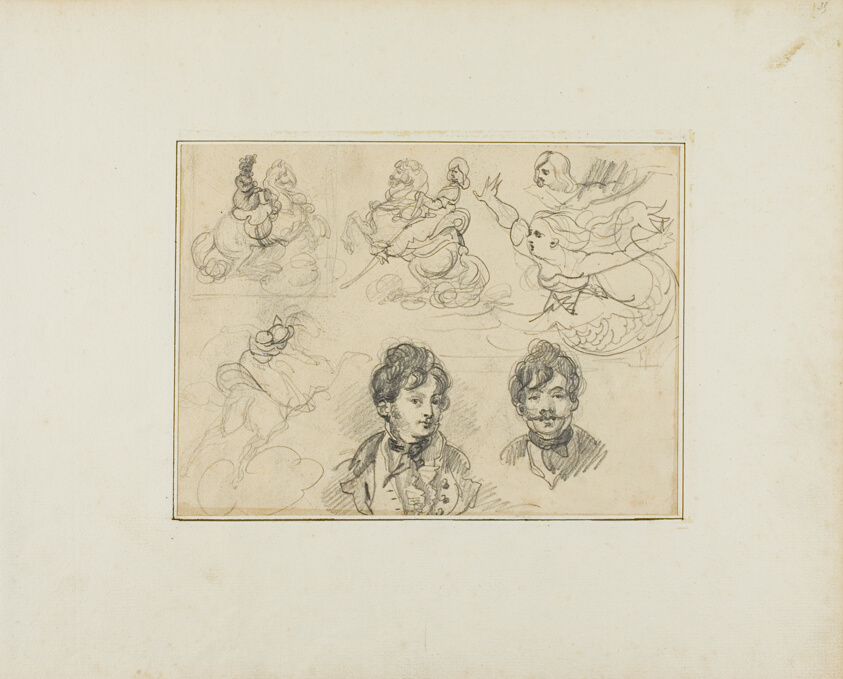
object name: Drawing and Watercolor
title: Sheet of Sketches: Riders, Mermaids and Two Portraits of Young Men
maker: Jean Louis André Théodore Géricault (French, 1791-1824)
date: 1813/14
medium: Graphite on tan wove paper, perimeter mounted on ivory laid paper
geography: France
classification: graphite; drawings (visual works); prints and drawing